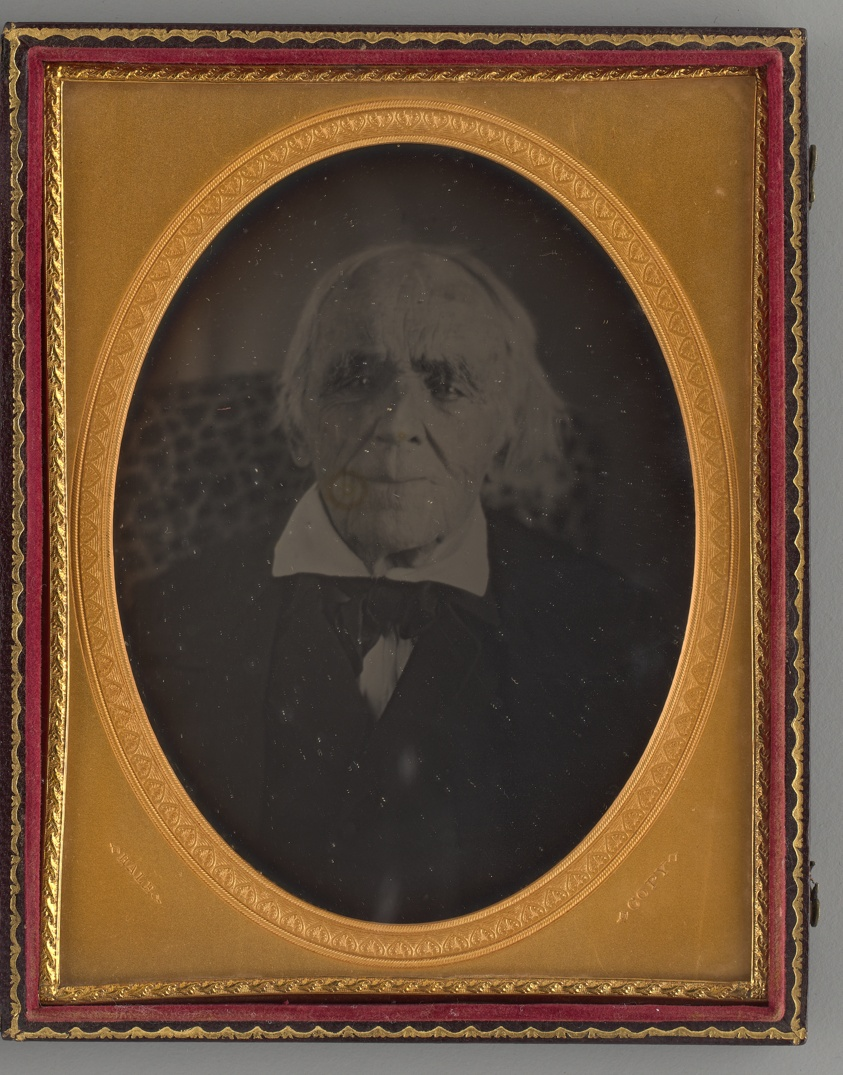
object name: Photograph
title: Untitled (Portrait of a Man)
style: 19th century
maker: L. H. Hale (American, 1823-1885)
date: 1850s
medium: Daguerreotype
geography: United States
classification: portrait; photograph; photographic process; photography; portrait; daguerreotype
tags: lundberg collection, portraits, portraits: male subject, Male, portrait